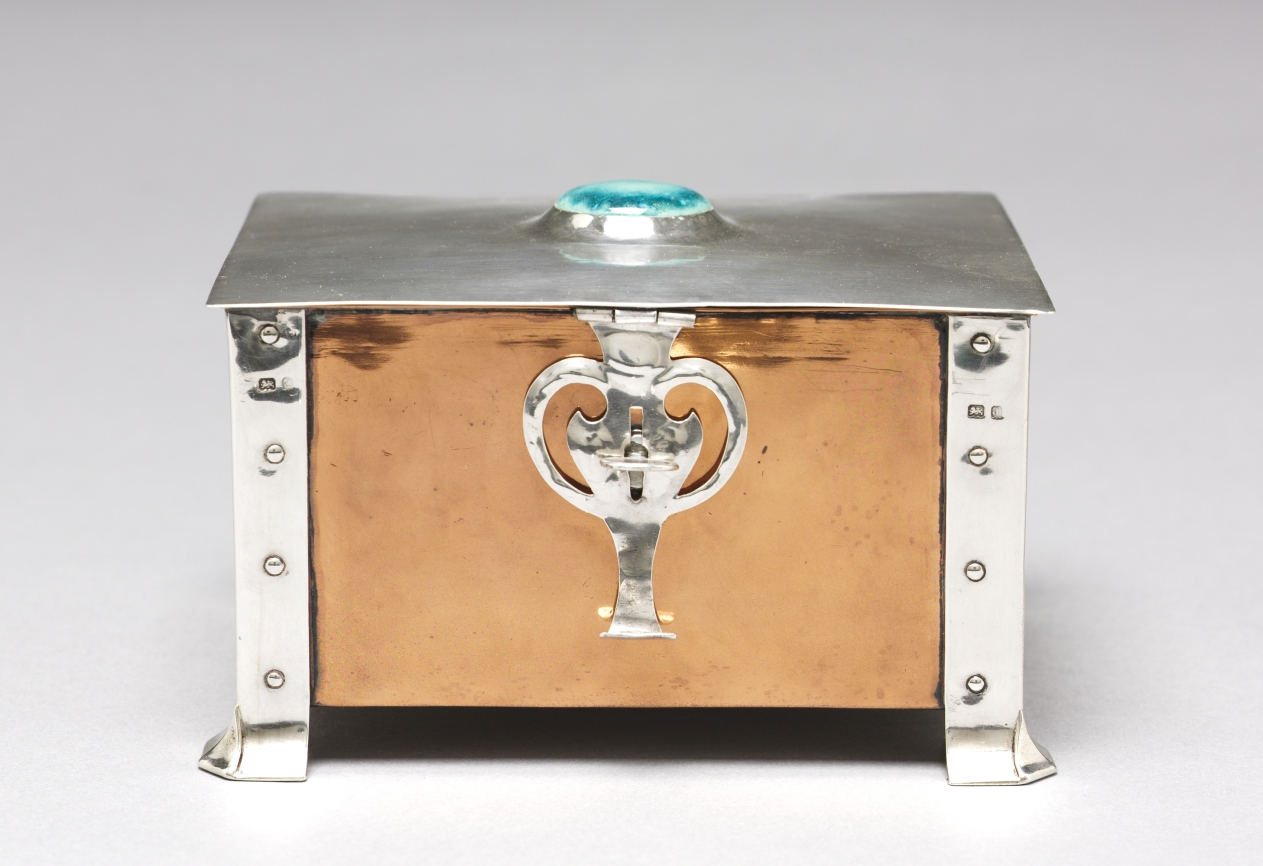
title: Covered Box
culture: England, Birmingham, early 20th Century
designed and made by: A. Edward Jones (British, 1878–1954)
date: 1903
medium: silver, copper, ceramic with wood lining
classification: Metalwork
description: British designer Albert Edward Jones founded A. Edward Jones in 1902, an Arts and Crafts metalworking firm that primarily produced ecclesiastical and domestic objects at the time of this box's creation. The box combines silver and copper metalwork, sleekly designed with limited embellishment.